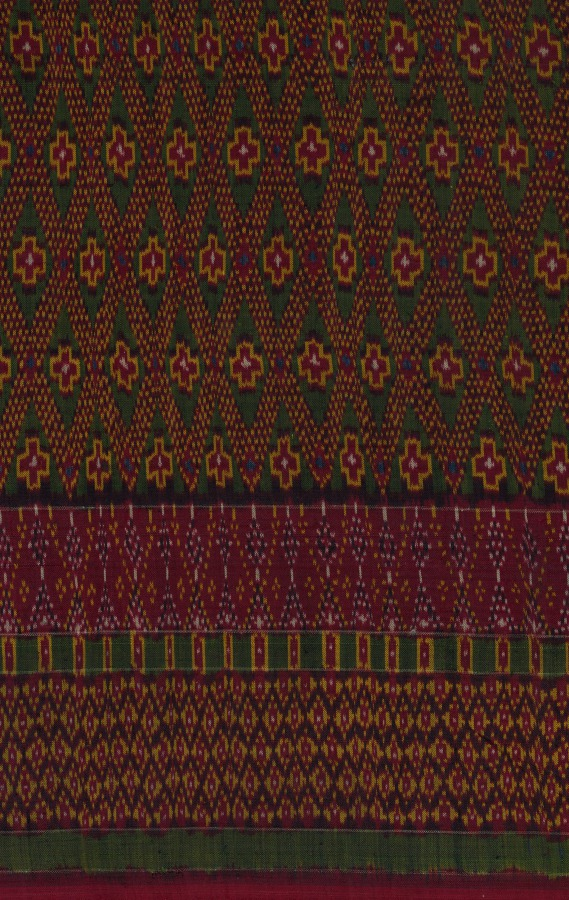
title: Silk "Sampot" (Loin Cloth)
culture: Cambodia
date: early 1900s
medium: Silk: tabby weave, weft ikat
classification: Textile